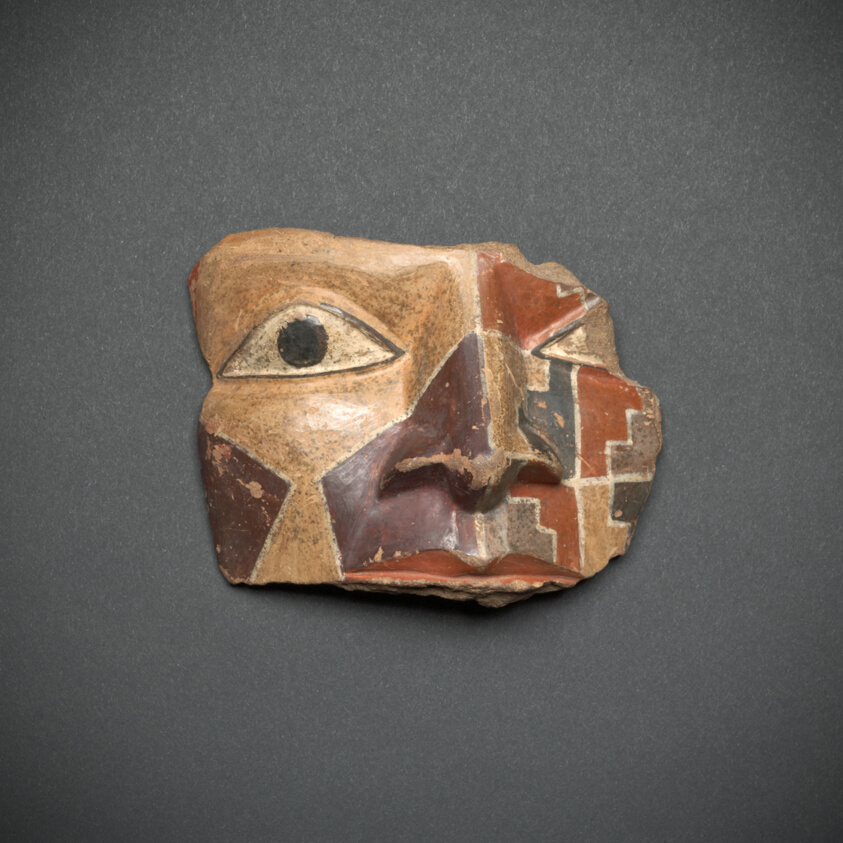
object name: Vessel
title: Head Fragment from a Large Ceremonial Jar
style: tiahuanaco, middle horizon, Pre-Columbian, americas, huari, andes, Arts of the Americas, andean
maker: Tiwanaku-Wari; Pacheco, south coast, Peru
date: 700–800 CE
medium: Ceramic and pigment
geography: Pacheco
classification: earthenware; ceramics; fragment; vessel; art of the americas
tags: people, faces